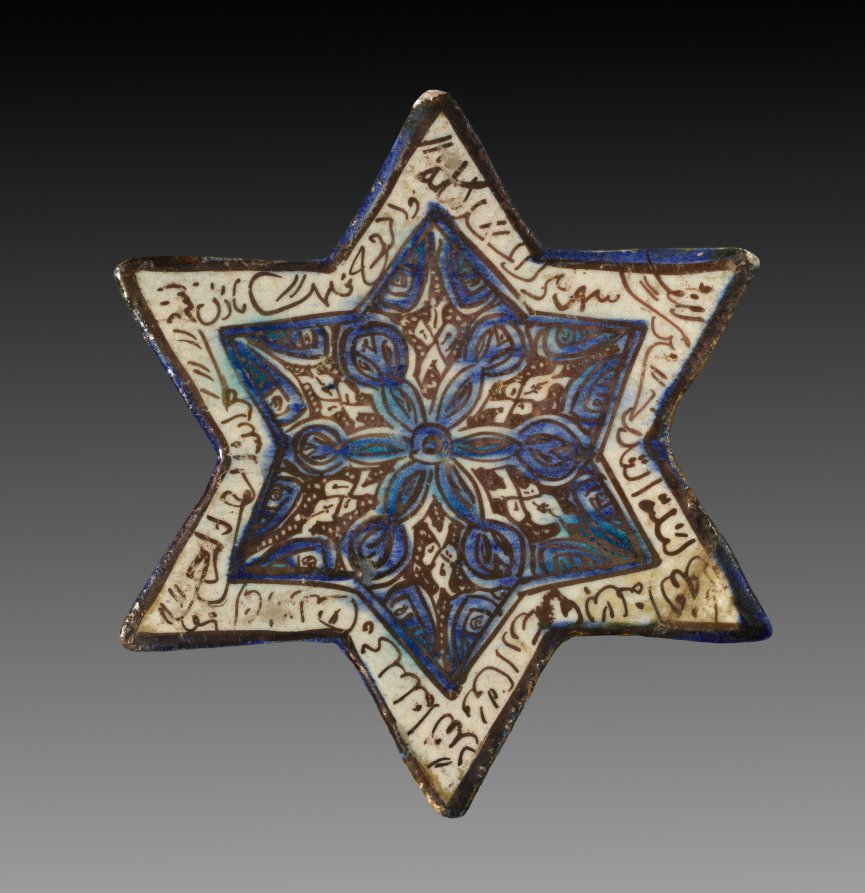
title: Wall Tile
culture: Iran, Kashan, Ilkhanid period (1256-1353)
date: 1300s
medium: fritware with luster-painted design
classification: Ceramic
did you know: This blue and brown luster tile in a 6-point star shape has a border with an inscription.